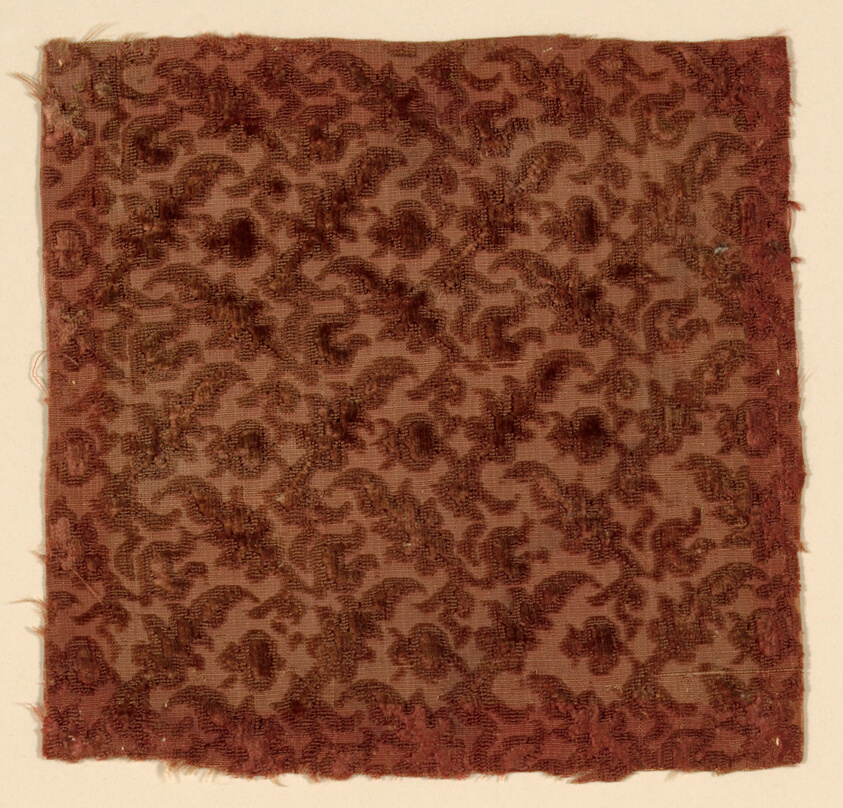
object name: Textile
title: Fragment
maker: Italy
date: 1601/25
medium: Silk, plain weave with supplementary pile warps forming cut and uncut voided velvet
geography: Italy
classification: textile; weaving - velvet